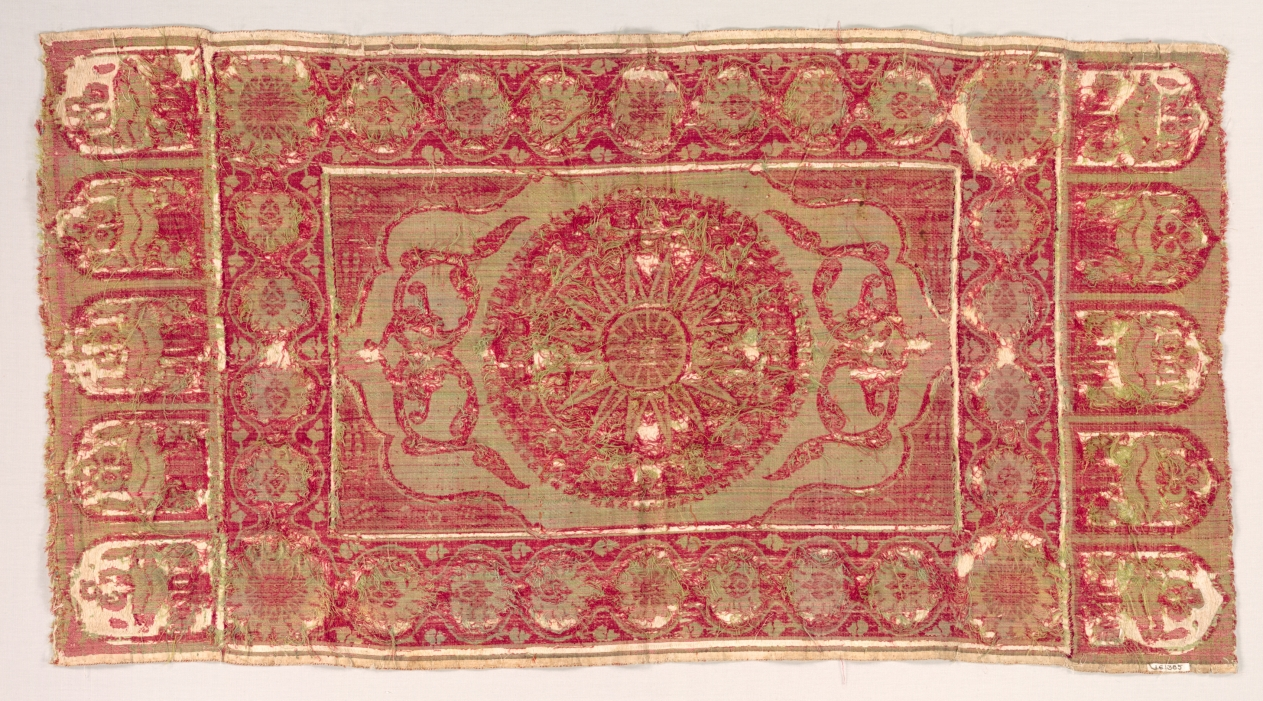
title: Velvet Divan Cushion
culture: Turkey, 17th century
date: 17th century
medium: velvet; silk (formerly on silver ground, which is now worn and darned)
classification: Velvet